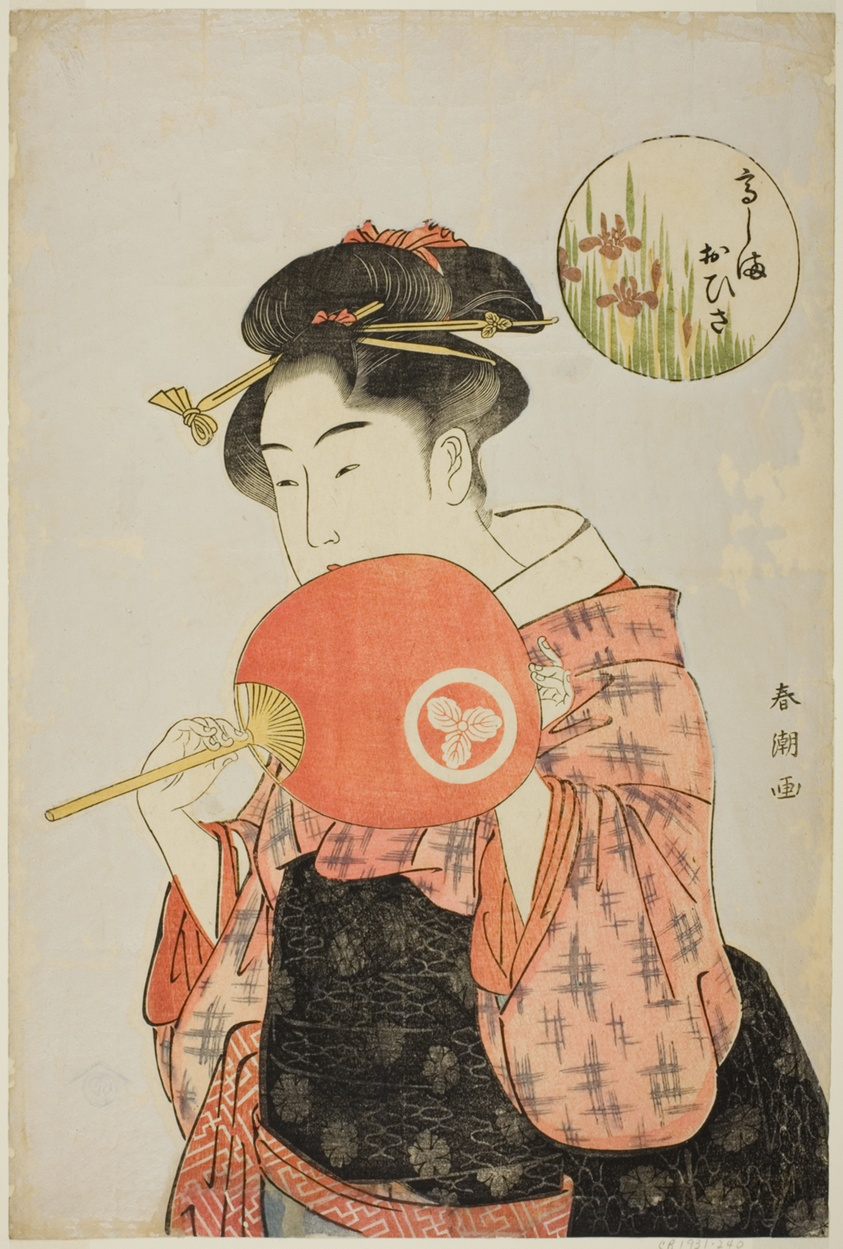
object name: Print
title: The Waitress Ohisa of the Takashimaya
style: Japanese (culture or style)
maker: Katsukawa Shuncho; Japanese, active c. 1780-1801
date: c. 1792/93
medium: Color woodblock print; oban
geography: Japan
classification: woodblock print; print; asian art